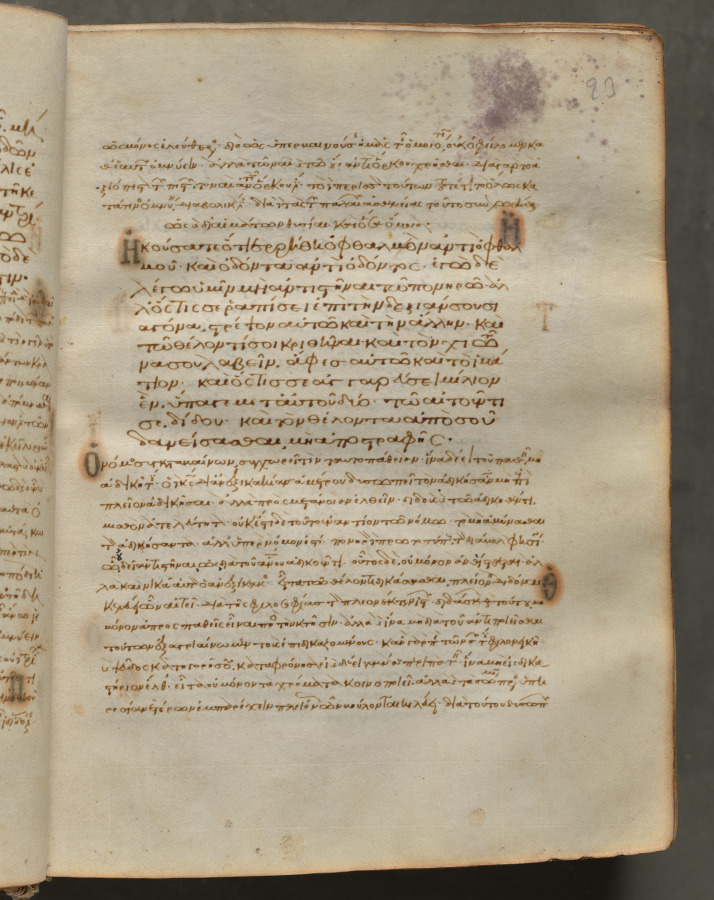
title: Text, folio 23 (recto), from a Gospel Book with Commentaries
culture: Byzantium, Constantinople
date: c. 1000–1100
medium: ink, tempera, and gold on vellum; leather binding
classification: Bound Volume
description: Each of the four gospels in this book opens on a page with brilliantly illuminated borders depicting the author of the text as well as birds-principally peacocks, symbols of the immortality of the soul-and fountains, representing the fountain of life and the salvation of the soul. This volume consists of 428 leaves with texts in Greek. Its level of sophistication suggests that it was probably written and decorated in a monastery in Constantinople.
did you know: Gospel Books were carried in procession through Byzantine churches.